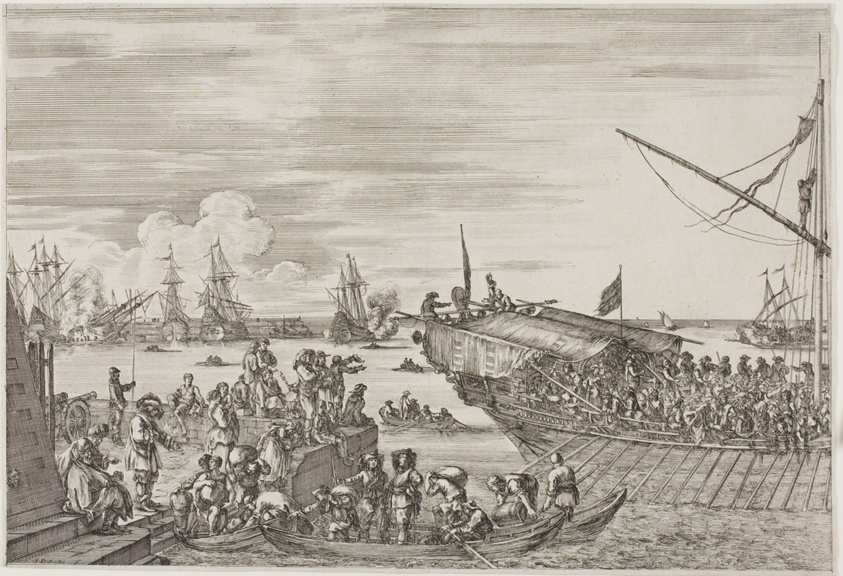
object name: Print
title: Le départ d'une Galère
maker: Stefano della Bella (Italian, 1610-1664)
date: 1654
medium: Etching on paper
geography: Italy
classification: etching; print; prints and drawing